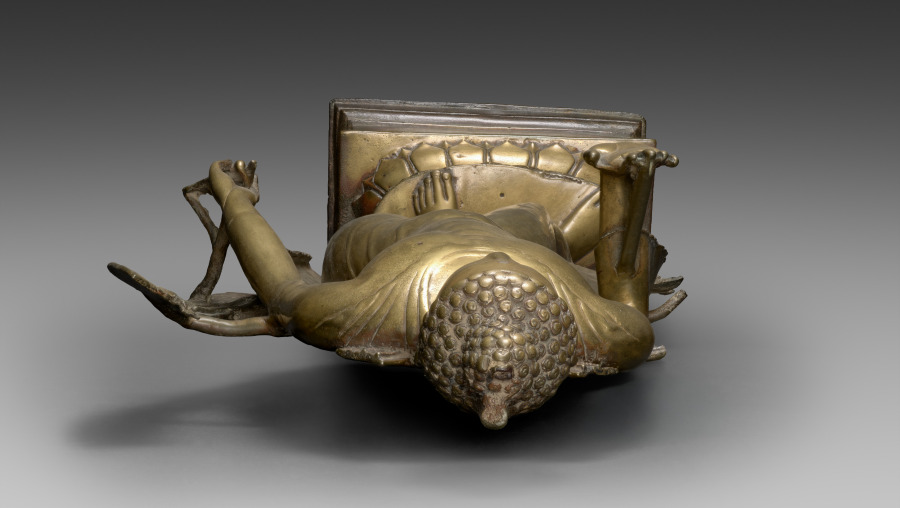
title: Standing Buddha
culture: India, Kashmir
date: c. 900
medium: brass with silver and copper inlay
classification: Sculpture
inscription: inscribed with the name of the monk who owned it: Lhatsun Nagaraja (active from c. 998 to 1026)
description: The slender athletic Buddha extends one foot slightly off the lotus pedestal, suggesting his humanity enters our world from his transcendent state. With his right hand he signals that we should have no fear. The smooth signs of wear on the sculpture indicate that it was worshiped in Kashmir, where water and other ablutions were poured over sacred images during rituals. The Tibetan inscription on the pedestal states that it belonged to a royal monk named Nagaraja (Tibetan, active about 998–1026). Sculptures like this contributed to the transmission of Buddhism from India to Tibet and served as artistic models.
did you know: The Buddha grasps the end of his robe in his left hand.